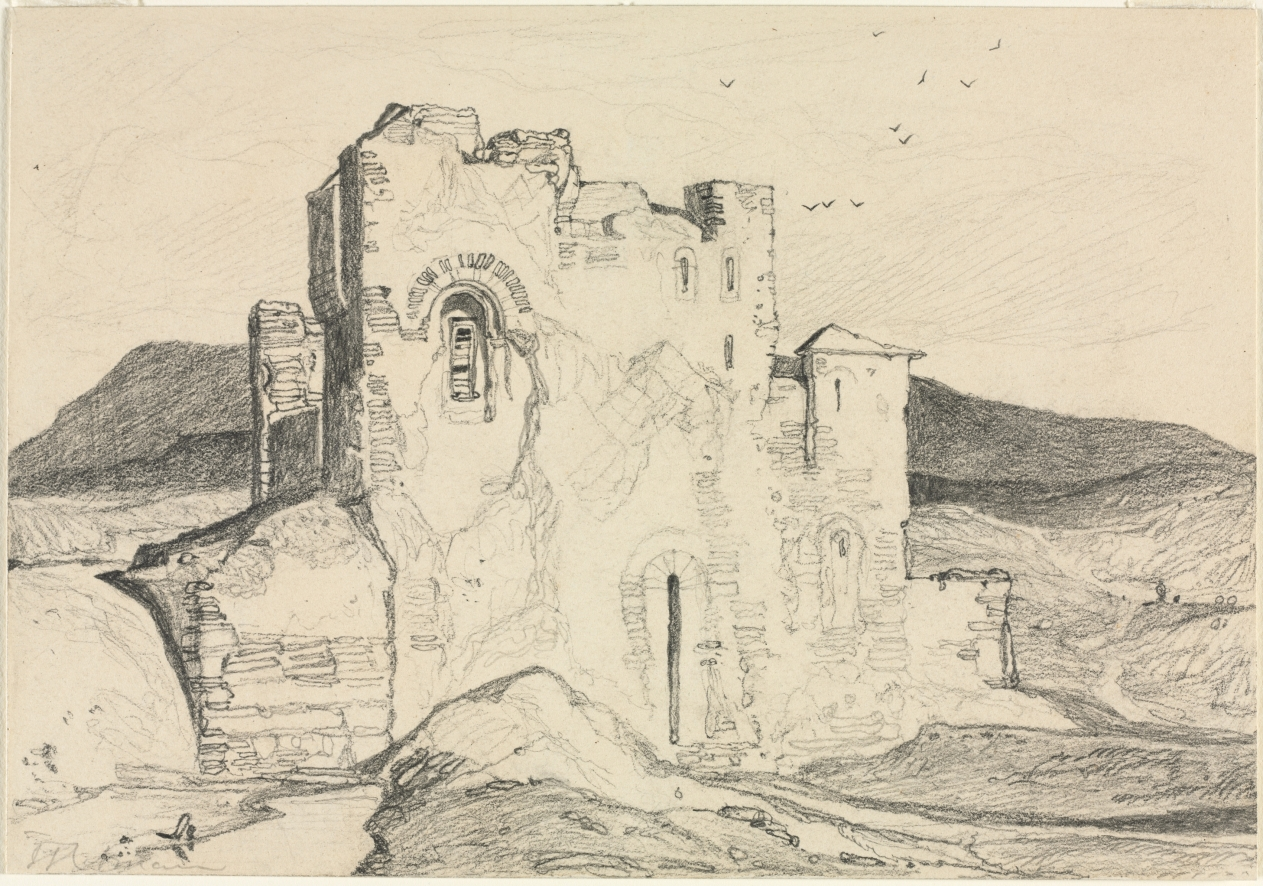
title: A Castle in Normandy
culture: England, 19th century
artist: John Sell Cotman (British, 1782–1842)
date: c. 1800–1842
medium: graphite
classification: Drawing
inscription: In graphite, lower left: "JS (initialed)"